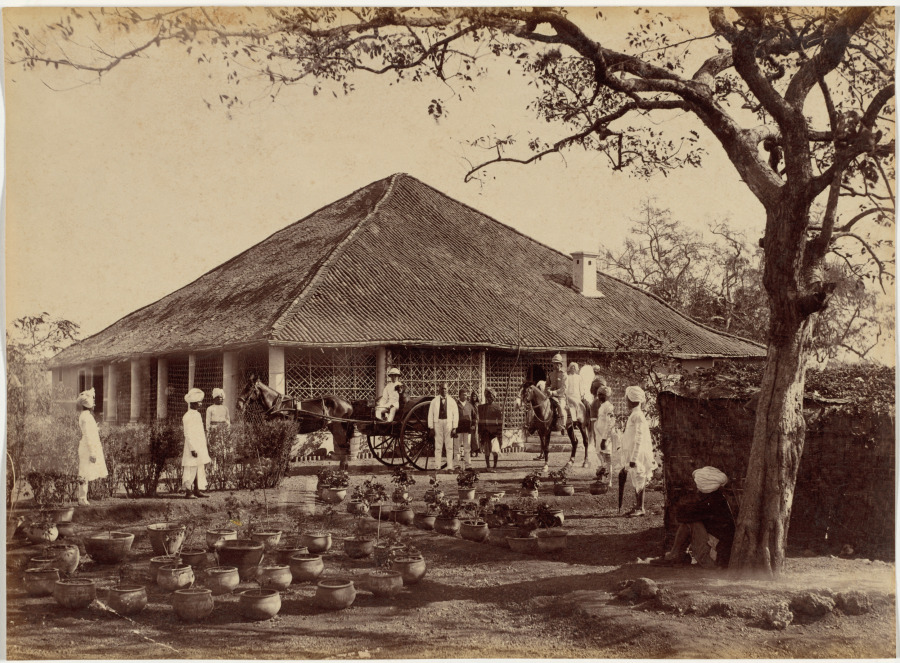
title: Reverend Loche at Neemuch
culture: India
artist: Raja Deen Dayal (Indian, 1844–1905)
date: 1887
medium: albumen print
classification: Photograph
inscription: No visible inscriptions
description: This building is a “dak bungalow,” one of the British government guesthouses that were central to the lives of British travelers in India. This network of houses offered places to eat, stay, rent fresh horses, and conduct business while traveling between residences. The bungalows’ wide latticed verandahs admitted breezes, kept out pests, and provided some privacy. The average British Indian military household had at least six servants; eleven Indian servants are shown here, including the only Indian woman pictured in this exhibition. Many images in this album show servants, but they are never mentioned in the captions.